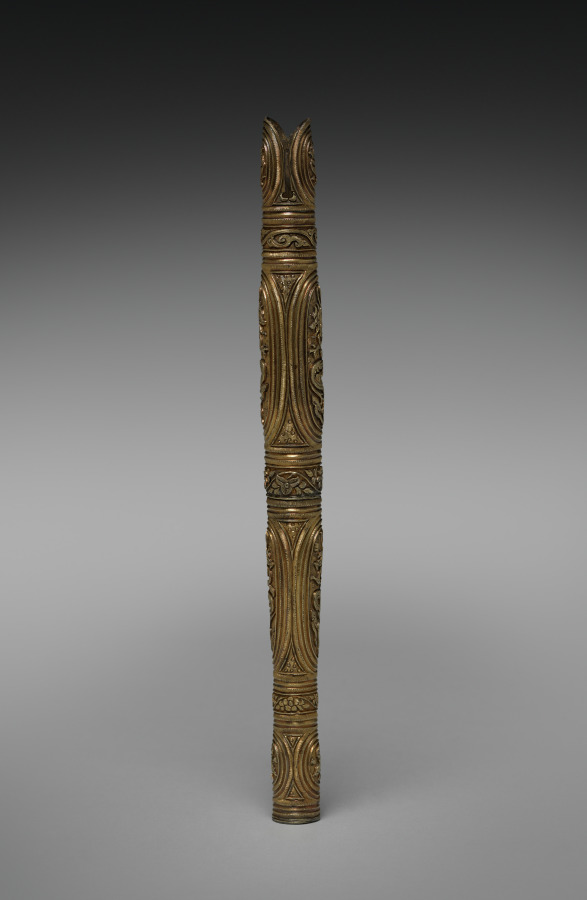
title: Knife Sheath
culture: Korea, Goryeo dynasty (918–1392)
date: 1100s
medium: Gilt silver (body) and brass (trefoil-shaped ring)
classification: Metalwork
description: Made by rolling a flat piece of silver plate, this knife sheath is decorated on each side with oval panels, including two larger middle panels showing an image of rising dragons with ring-punched scales. The circular upper panels bear the image of seated phoenixes. The flat bottom is engraved with a pair of fish, symbolizing harmonious unity. The trefoil-shaped ring attached to the tip of the sheath allows a string to connect it as a pendant to a belt. In medieval Korea, a miniature sheath such as this was considered an important fashion item, especially for elite members of the ruling class.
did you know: This 12th-century silver-gilt knife sheath is meant to be a pendent to a belt as a luxury ornament.